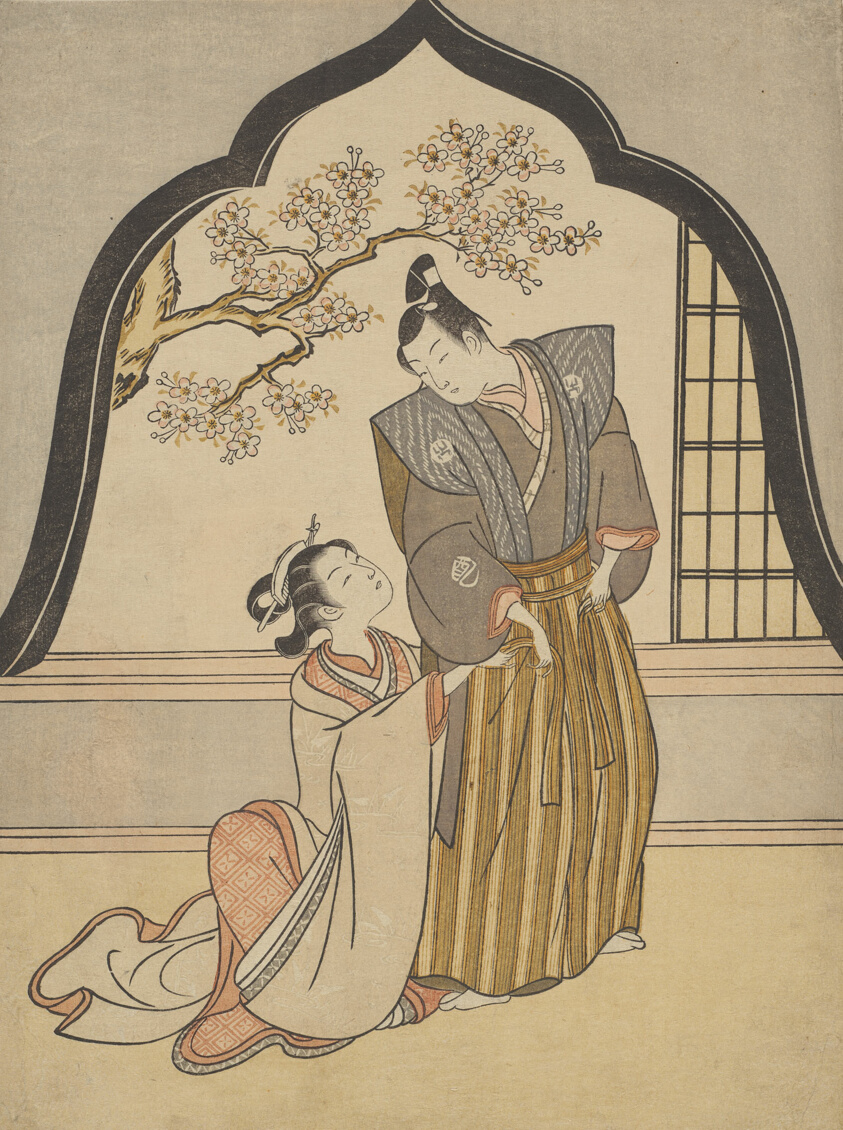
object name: Print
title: Lovers Dressing Beside a Window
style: Japanese (culture or style)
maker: Suzuki Harunobu 鈴木 春信; Japanese, 1725 (?)-1770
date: 1765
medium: Color woodblock print; chuban, surimono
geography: Japan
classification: woodblock print; print; asian art